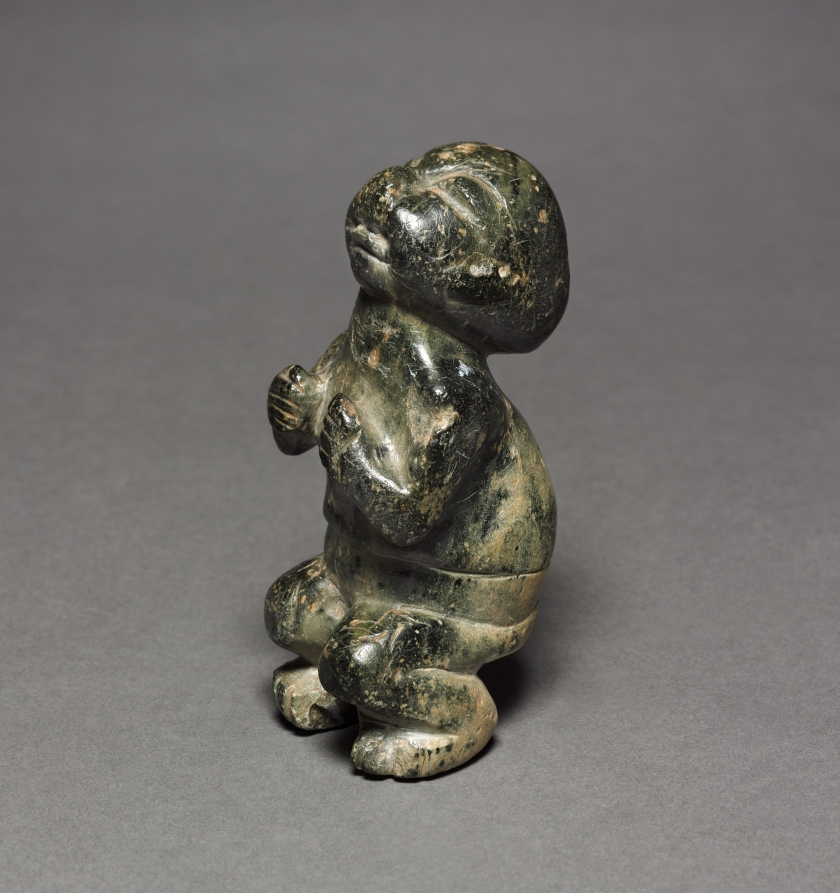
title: Crouching Figure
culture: Mexico, Guerrero, Olmec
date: 900–300 BCE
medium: serpentine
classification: Sculpture